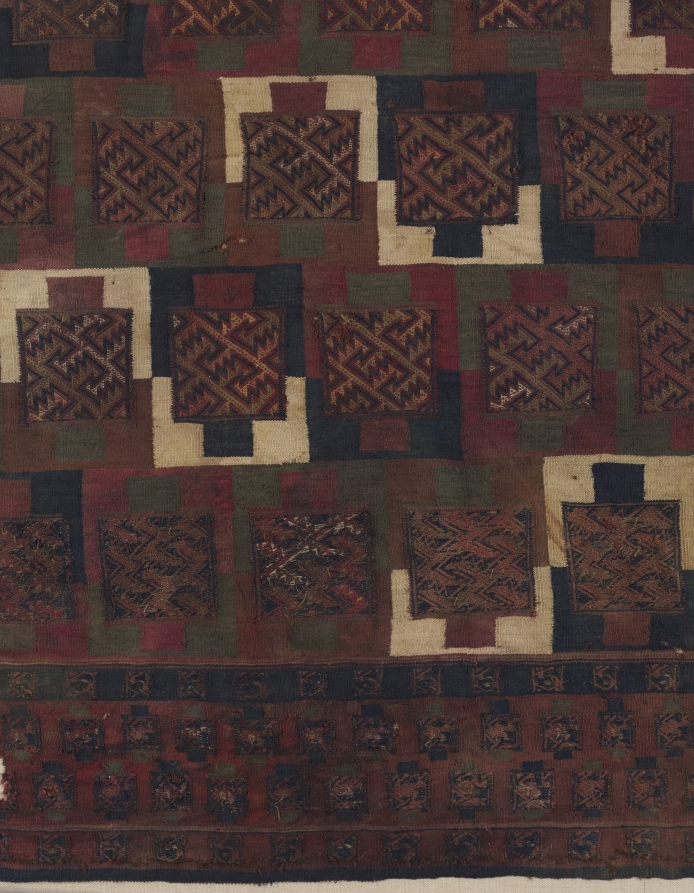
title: Dress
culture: Peru, South Highlands or South Coast, Chuquibamba style, 12th-16th century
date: c. 1100–1532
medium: camelid fiber; tapestry and complementary-weft weave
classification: Textile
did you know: This wrap-around textile is meant for a female; the upper border folds over the bodice.